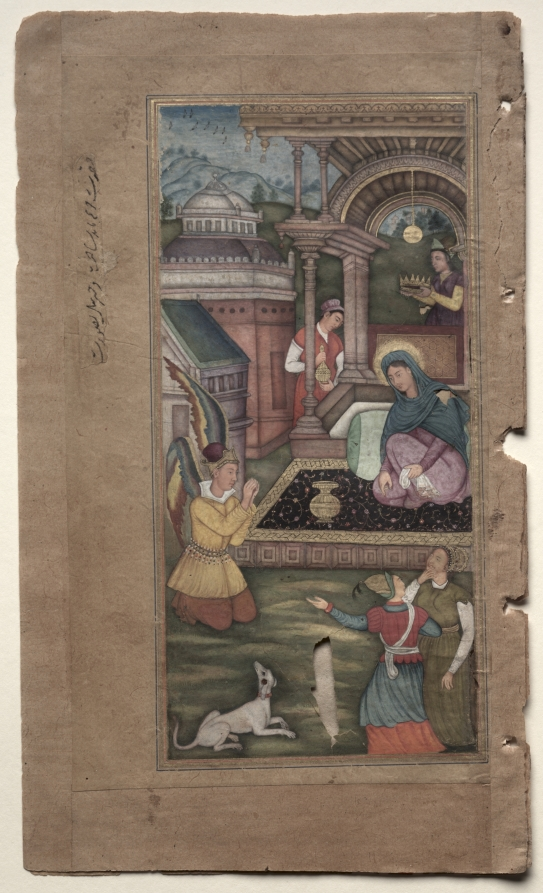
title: The Annunciation (folio 15 recto), from a Mirror of Holiness (Mir’at al-quds) of Father Jerome Xavier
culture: Mughal India, Allahabad, made for Prince Salim (1569–1627)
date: 1602–4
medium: Gum tempera, ink, and gold on paper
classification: Manuscript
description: Mary gazes down at the angel Gabriel as he kneels reverently, like a humble messenger, delivering the news that Mary will give birth to the son of God. His multicolored wings are forced within the boundary line of the painting field, visually implying a sense of subordination. Unlike many of the paintings in the Mirror of Holiness, the Annunciation is a familiar subject in European art, but the emphases vary. The Indian version depicts her as a queen, with a crown held above her head and attendants standing by.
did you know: The text states that Mary was only age 13 1/2 when the angel Gabriel came to her.